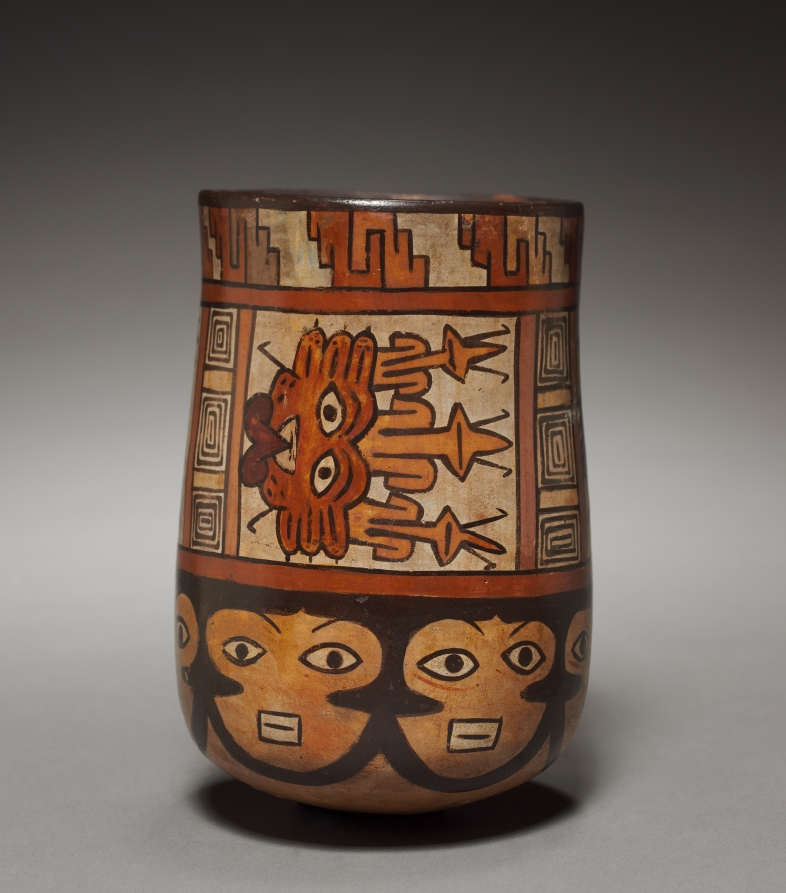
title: Vessel with Female Faces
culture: Peru, South Coast, Nasca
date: 100 BCE–700 CE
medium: earthenware with colored slips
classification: Ceramic